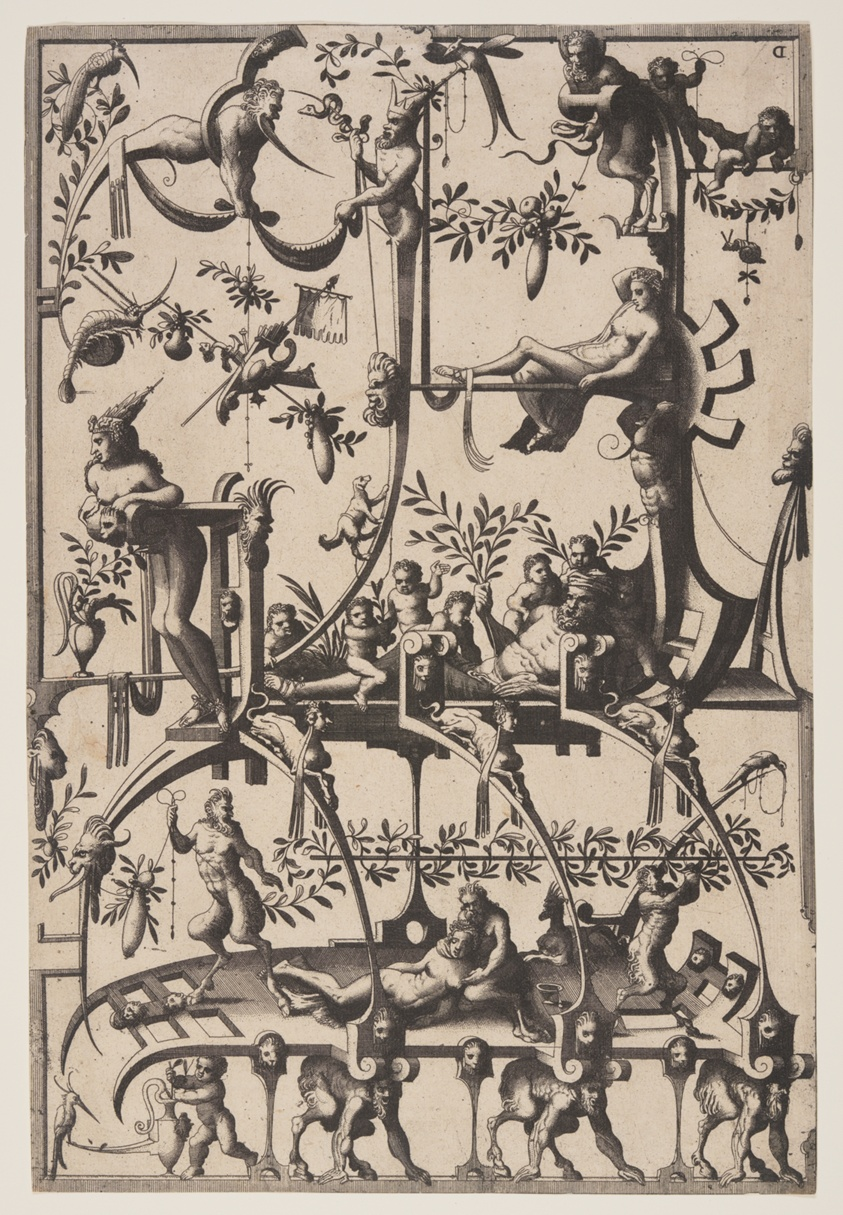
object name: Print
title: Grotesque Ornament and Tomb Design, from Veelderleij veranderinghe van grotissen...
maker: Johannes van Doetecum (Netherlandish, 1528/32–1605) and Lucas van Doetecum (Dutch, died before 1584); after Cornelis Floris (Flemish, 1514-1575)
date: 1556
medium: Etching on ivory laid paper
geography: Netherlands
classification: print; paper; prints and drawing; etching